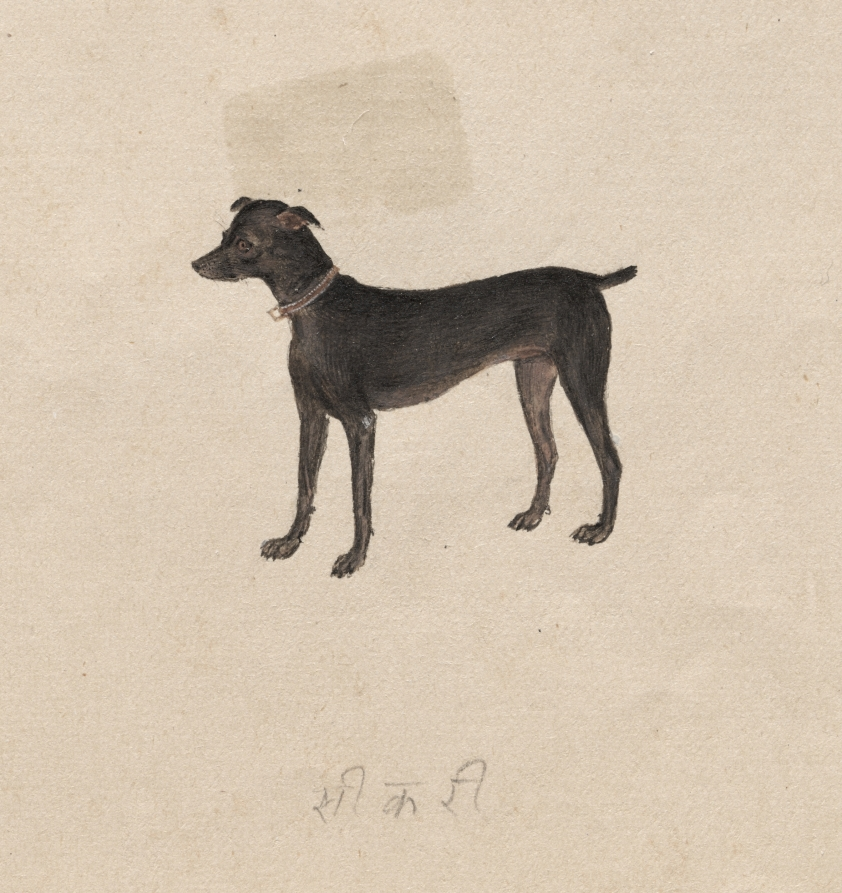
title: Sikari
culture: British India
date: 1890s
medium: Gum tempera and graphite on paper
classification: Drawing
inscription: Sikari